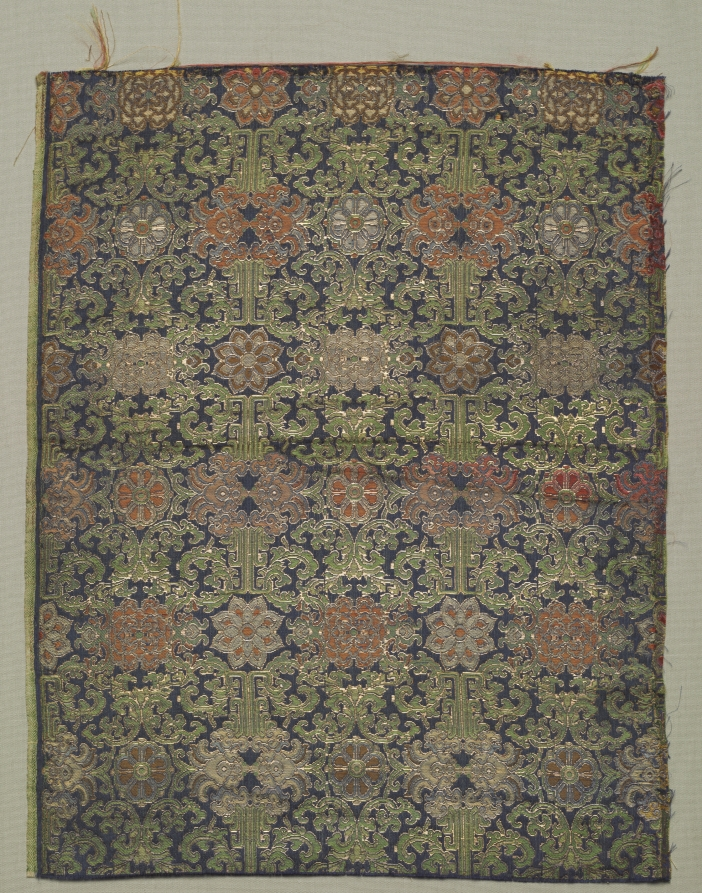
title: Fragment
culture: Japan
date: 1800s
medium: silk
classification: Textile